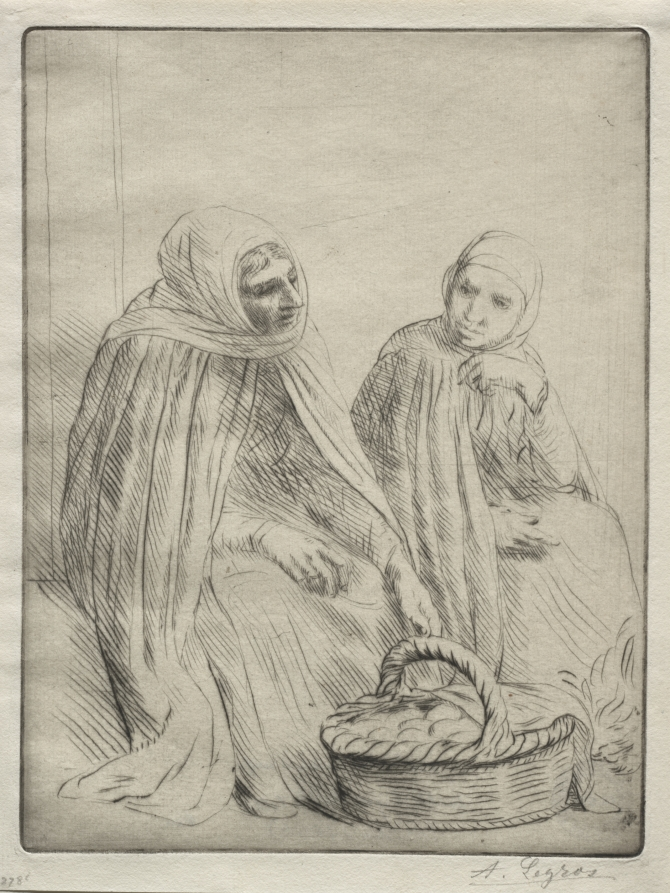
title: The Egg Merchants (1st Plate)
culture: France, 19th century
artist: Alphonse Legros (French, 1837–1911)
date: c. 1857–1911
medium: drypoint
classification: Print